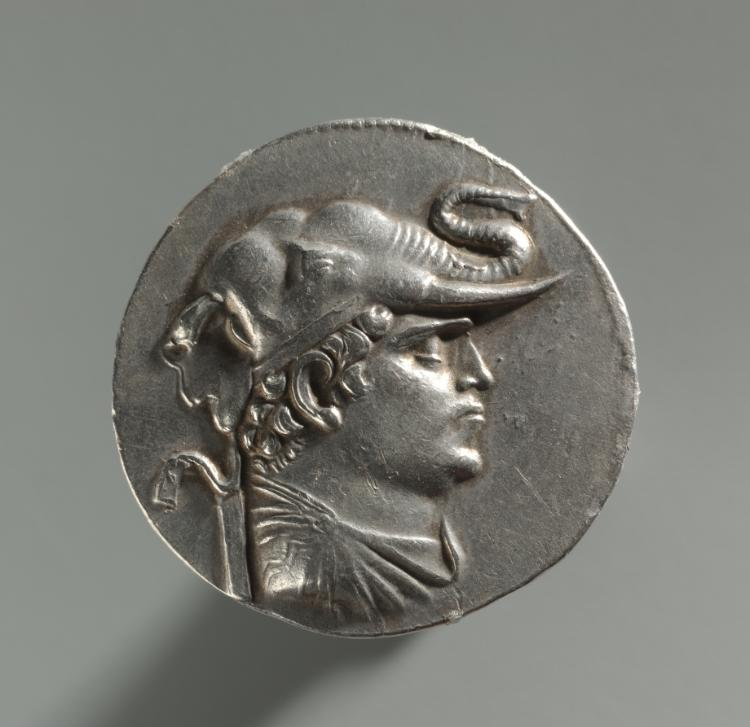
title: Tetradrachm Coin of Demetrios I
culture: Afghanistan, Bactria, Indo-Greek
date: 200–190 BCE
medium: silver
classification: Coins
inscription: BASILEOS DEMETRIOU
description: Demetrios I (222–180 BC) ruled the Indo-Greek kingdom of Bactria from 200 to 180 BC and minted this coin to commemorate his conquests over territories to the south, in present-day Pakistan. He linked his image on his coin to Alexander of Macedon (356–323 BC), who depicted himself with a lion scalp after his conquest of India; Demetrios substituted an elephant for the lion. On the reverse is Hercules, also identified with Alexander.